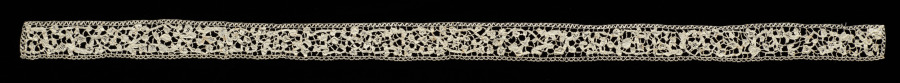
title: Lace Edging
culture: Unassigned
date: 1800s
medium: Linen: bobbin lace braid, needle lace brides picotée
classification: Lace